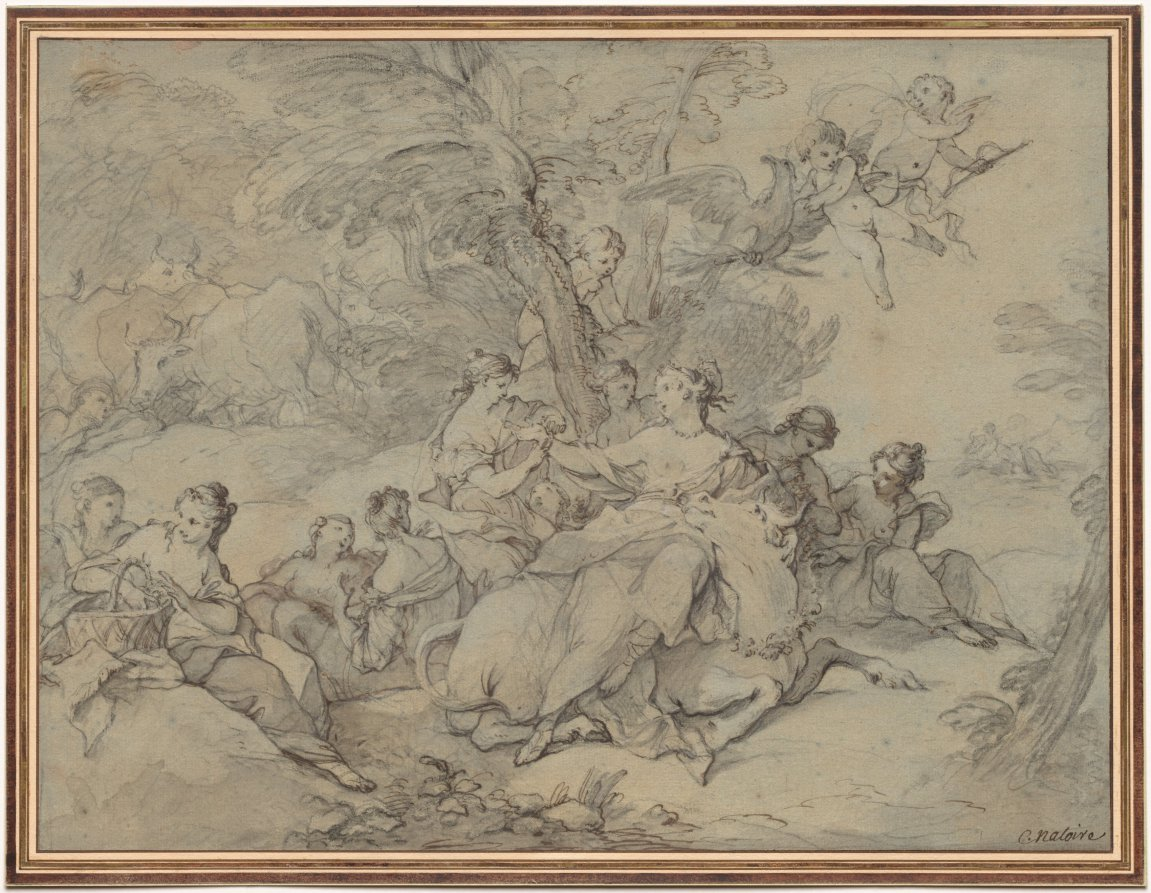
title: Rape of Europa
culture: France, 18th century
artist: Charles Joseph Natoire (French, 1700–1777)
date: 1731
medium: pen and black and brown ink, gray and brown wash, and black chalk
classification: Drawing